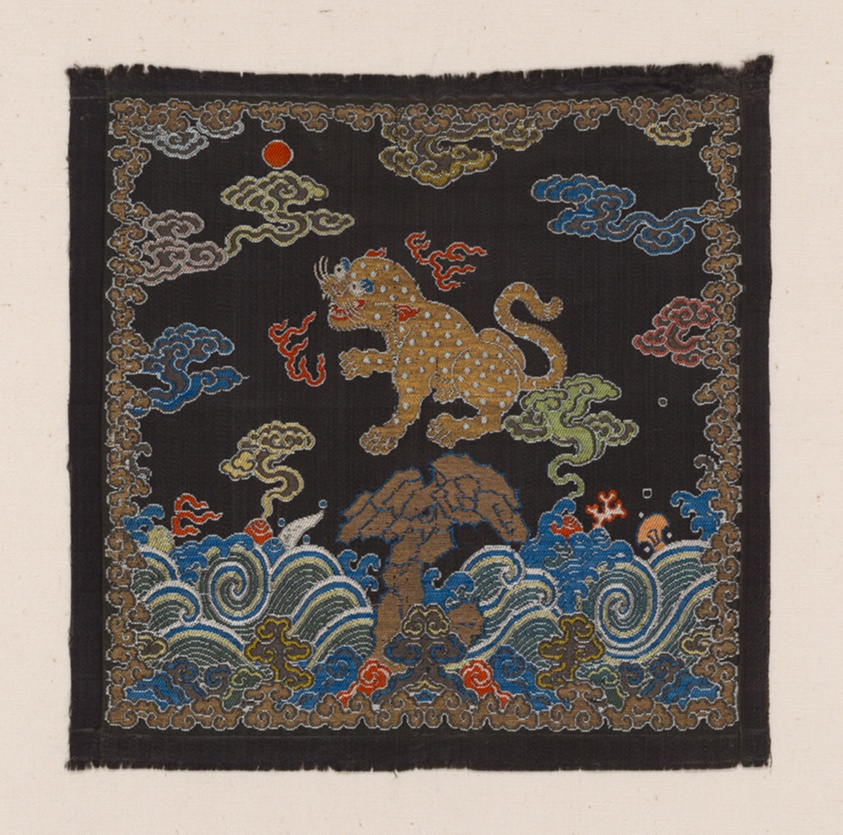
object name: Textile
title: Buzi (Court Rank Badge)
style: manchu-style, Chinese (culture or style), East Asian, asian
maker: Manchu (China)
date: Qing dynasty (1644–1911), 1775/1800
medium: Silk and gold-leaf-over-lacquered-paper-strip-wrapped silk, warp-float faced 7:1 satin weave with supplementary brocading wefts and self-patterning ground wefts bound in weft-float faced 1:3 'Z' twill interlacings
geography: China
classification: textile; weaving